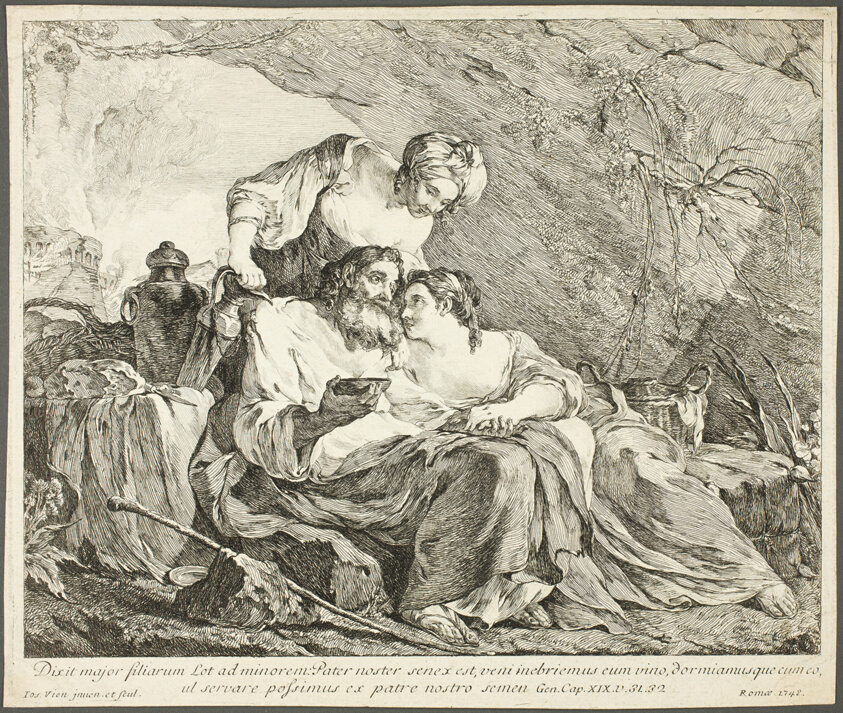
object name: Print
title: Said Mayor Filarum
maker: Joseph-Marie Vien, the elder; French, 1716–1809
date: 1748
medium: Etching on ivory wove paper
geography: France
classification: etching; print; prints and drawing